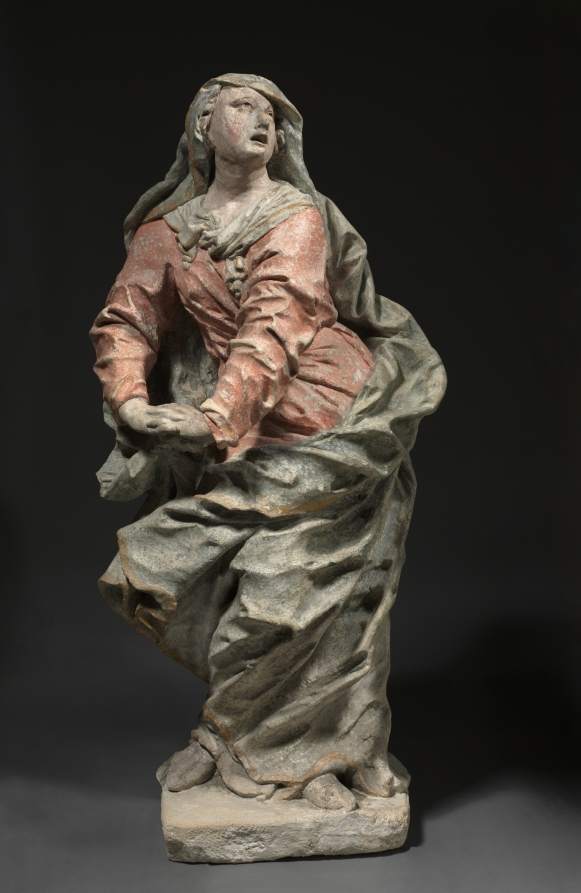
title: Mourning Mary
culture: Austria, Vienna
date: c. 1710–40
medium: stone with traces of original color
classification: Sculpture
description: This figure’s orientation suggests it may have been part of a Crucifixion group, situated to the left of Christ with another figure to the right to balance the composition. Fingers knotted in prayer, lips parted in anguish, the Virgin appears to recoil from the sight of her son on the cross. Her contorted pose and agitated draperies are visible manifestations of her grief. Obvious signs of wear to the stone suggest that the group may have been set outside of a church, perhaps atop pillars.